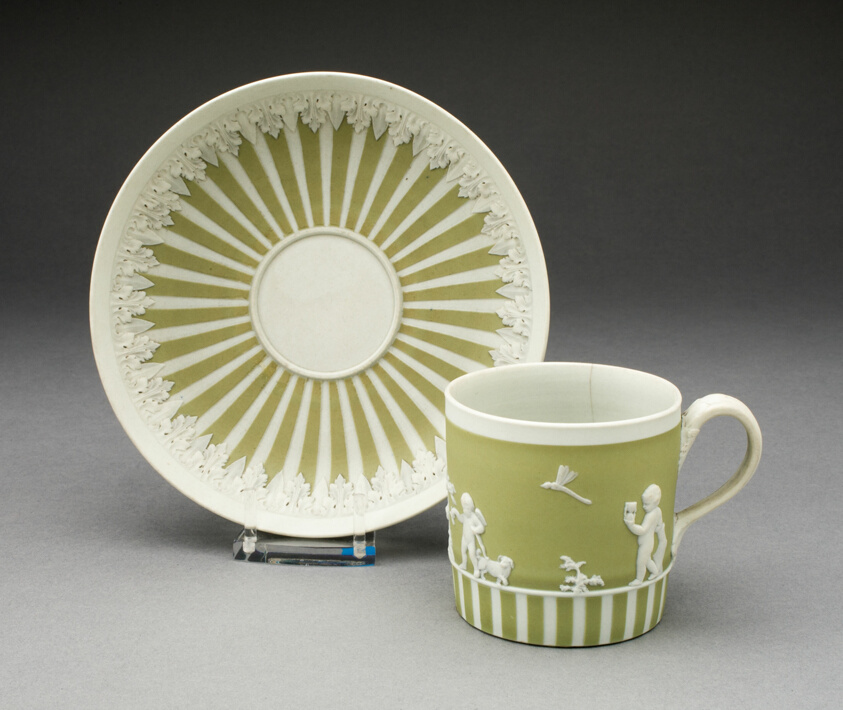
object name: Ceramics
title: Coffee Can and Saucer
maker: Wedgwood Manufactory (England, founded 1759)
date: c. 1790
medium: Stoneware: green jasperware with white relief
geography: Burslem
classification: teaware; stoneware; european decorative arts; ceramics